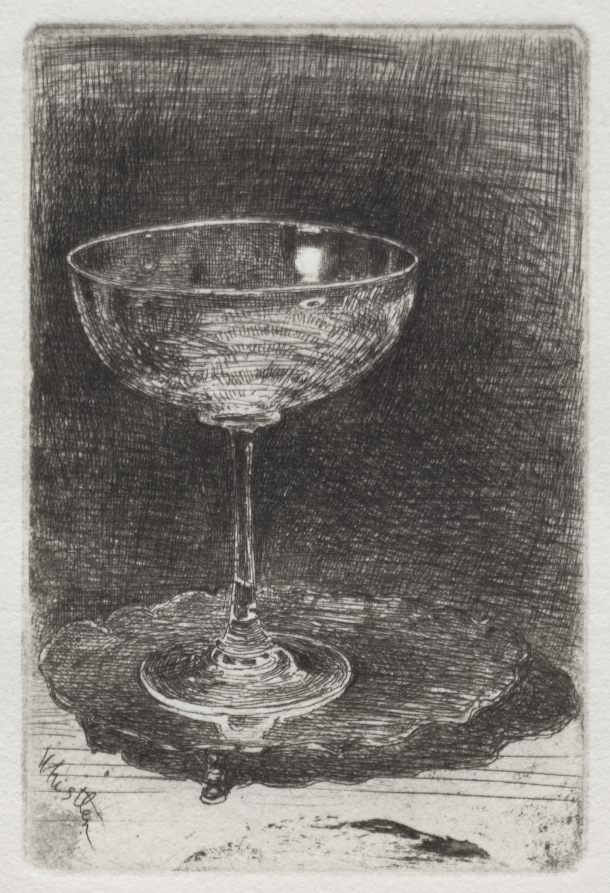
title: The Wine Glass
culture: America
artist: James McNeill Whistler (American, 1834–1903)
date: 1858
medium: etching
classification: Print